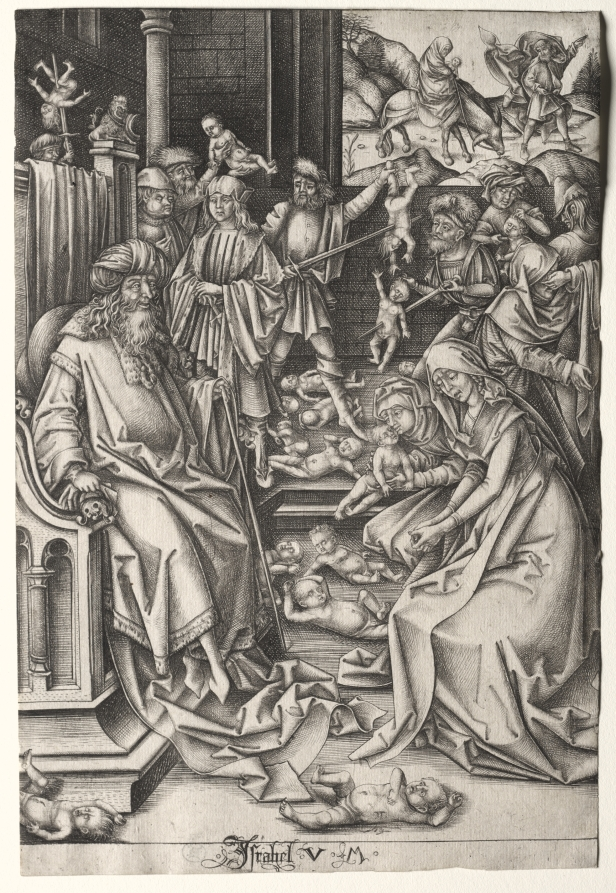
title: The Life of the Virgin: The Massacre of the Innocents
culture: Germany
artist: Israhel van Meckenem (German, c. 1440–1503)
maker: after Hans Holbein (German, c. 1465–1524)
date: c. 1490–1500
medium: engraving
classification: Print